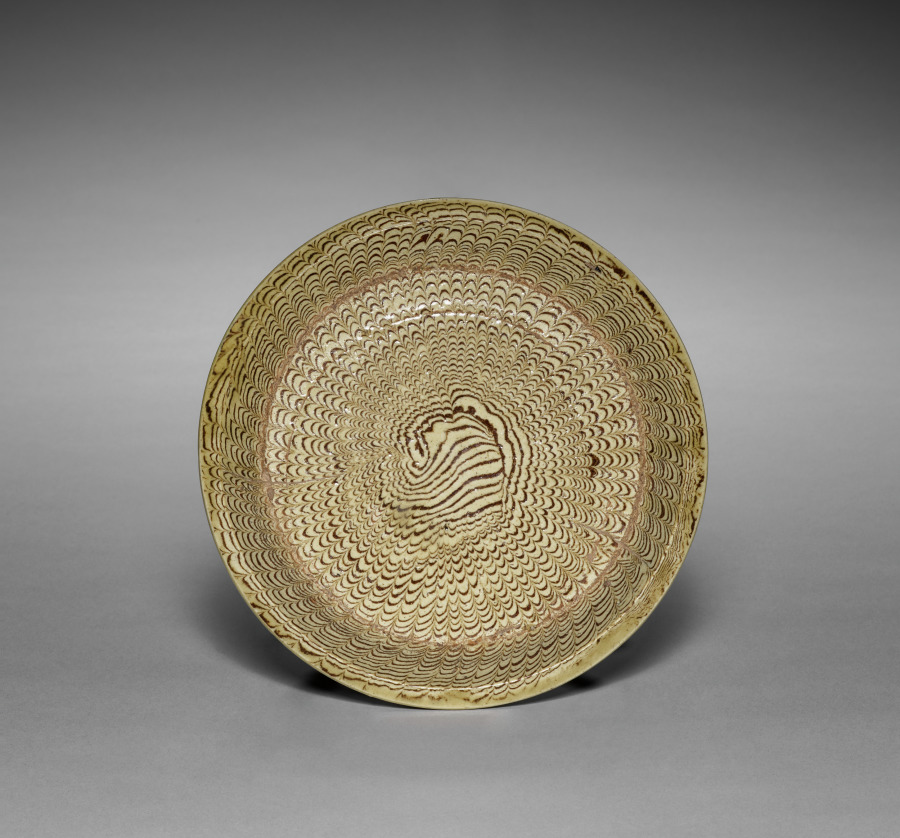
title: Flat Dish Made of Marbled Clay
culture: North or Central China, Northern Song (960–1127) or Jin dynasty (1115–1234)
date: 960–1234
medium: Stoneware with marbled clay and transparent glaze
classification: Ceramic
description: Using the marbling technique, in which light- and dark-colored clays are kneaded together (jiaotai; 絞胎), this dish is entirely covered with a transparent glaze, further enhancing the contrasting effect. The mixed clay technique had been used in northern China since the Tang dynasty (618–906), suggesting that potters may have attempted to imitate the effect of precious marbled glass from the ancient Near East that was traded via the Silk Road. The Keithleys acquired this dish to accompany the monumental ink drawing Poetic Pattern of Song Ware (CMA 2020.146) in their collection, that was inspired by such a ceramic.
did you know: This dish features lively contrasting black and beige clay marbling underneath a transparent glaze.